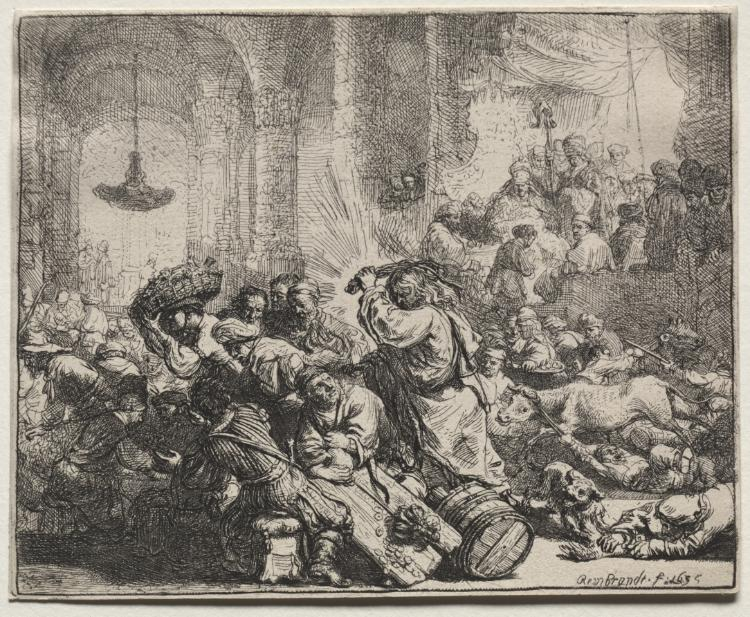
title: Christ Driving the Money Changers from the Temple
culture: Netherlands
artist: Rembrandt van Rijn (Dutch, 1606–1669)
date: 1635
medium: etching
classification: Print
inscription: lower right, in plate: Rembrandt·f·1635 ; lower left, in pen and brown ink: E.P. ; VERSO, center right, in graphite (erased): [illegible]; lower left, in graphite: 1208[underlined twice] ; lower left, in graphite: [illegible] ; lower left, in graphite: C15938 ; lower center, in graphite: fine with small mouth ; lower center, in graphite: 34a